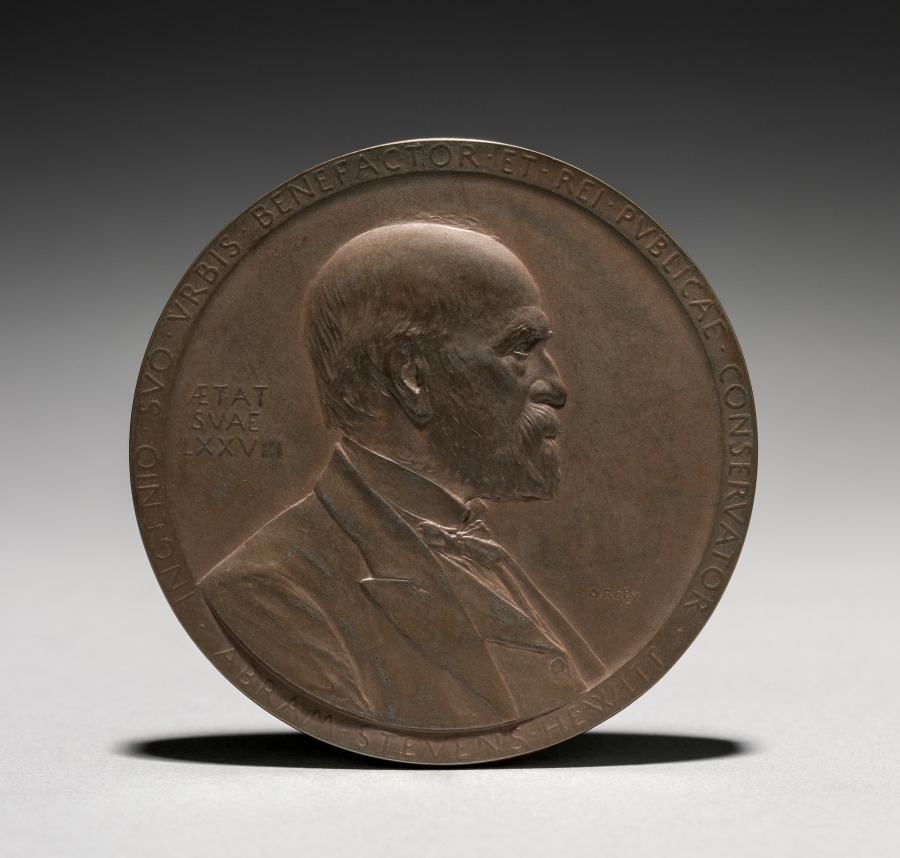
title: Medal: Abram Stevens Hewitt (obverse)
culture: France, late 19th-early 20th century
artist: Louis-Oscar Roty (French, 1846–1911)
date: 1875–1925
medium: bronze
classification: Metalwork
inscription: "INGENIO . SVO . VRBIS . BENEFACTOR . ET . REI . PVBLICAE . CONSERVATOR . ABRAM STEVENS HEWITT"; left of portrait bust: "AETAT/SVAE/LXXVIII"; right of portrait bust: "© Roty." On edge: "Tiffany & Co."